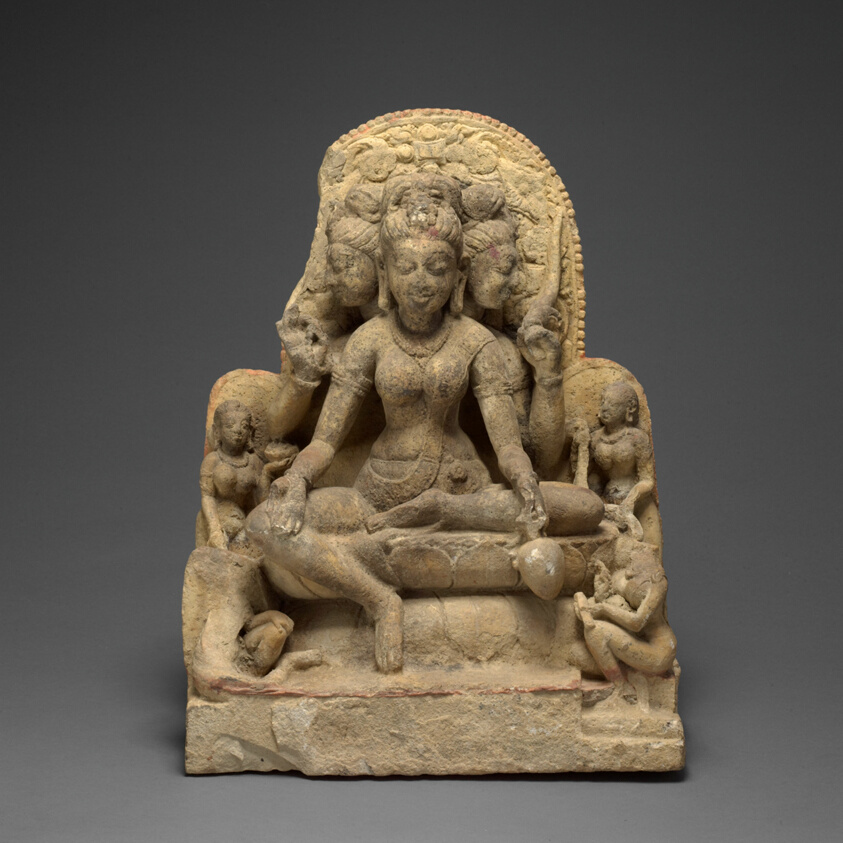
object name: Sculpture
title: Mother Goddess Brahmani Seated in Royal Ease (Lalitasana) with Attendants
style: South Asian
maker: India; Madhya Pradesh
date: 9th century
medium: Red sandstone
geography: Madhya Pradesh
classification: sandstone; stone; sculpture; asian art